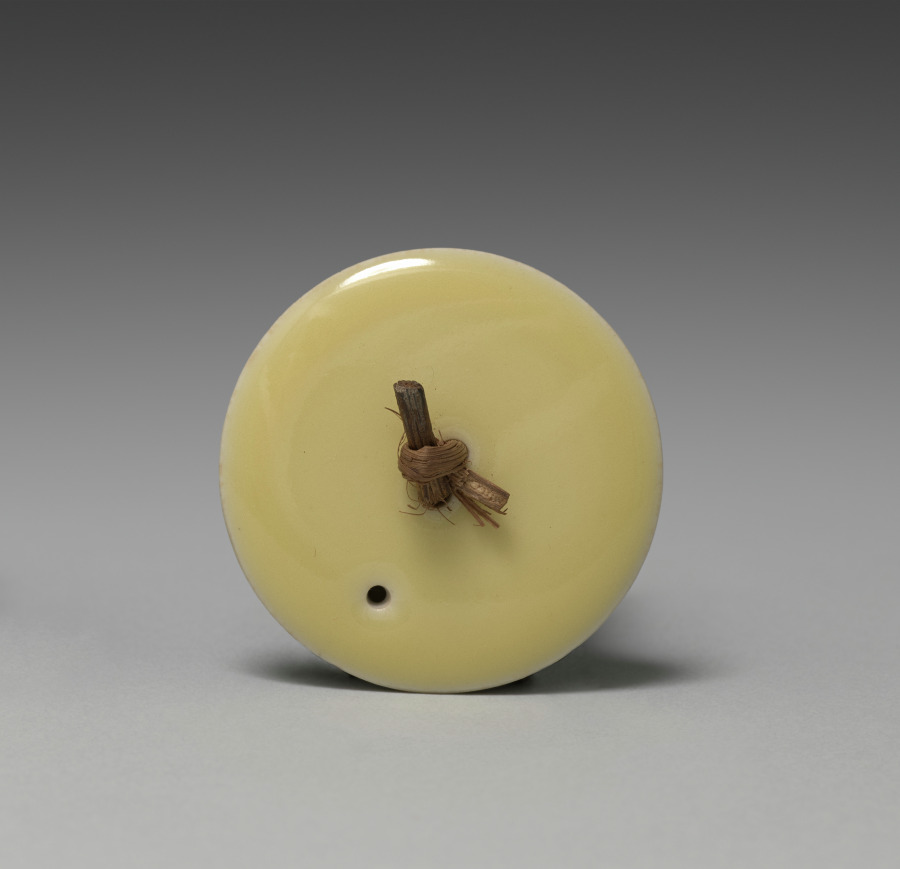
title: Lid for a Sake Pourer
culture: Japan, Taishō period (1912–26) or Shōwa period (1926–89)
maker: Seifū Yohei IV (Japanese, 1872–1951)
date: 1914–46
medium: Porcelain with yellow glaze and bamboo lid handle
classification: Ceramic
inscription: 清風造 。 【印】 清風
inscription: 成山清風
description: Like his father, Yohei IV also produced works with red or yellow monochrome glazes. His yellow-glazed works include this pair of sake pourers, a set of five drinking cups CMA 2022.217, and a sweets bowl molded into the shape of a chrysanthemum CMA 2022.218.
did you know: The lid's handle is made of bamboo.